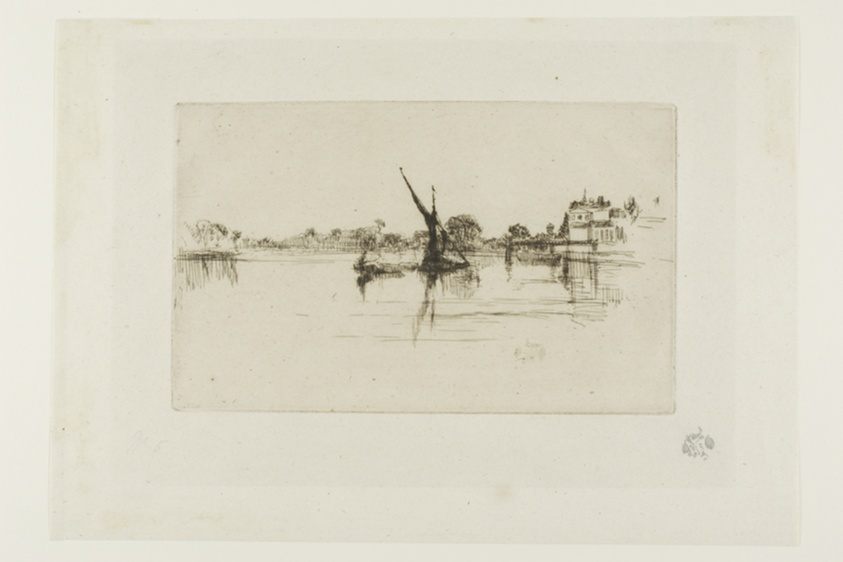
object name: Print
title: The Little Putney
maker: James McNeill Whistler (American, 1834-1903)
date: 1879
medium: Etching and drypoint with foul biting in black ink on cream laid paper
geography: United States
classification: etching; foul biting; drypoint; print; prints and drawing; paper